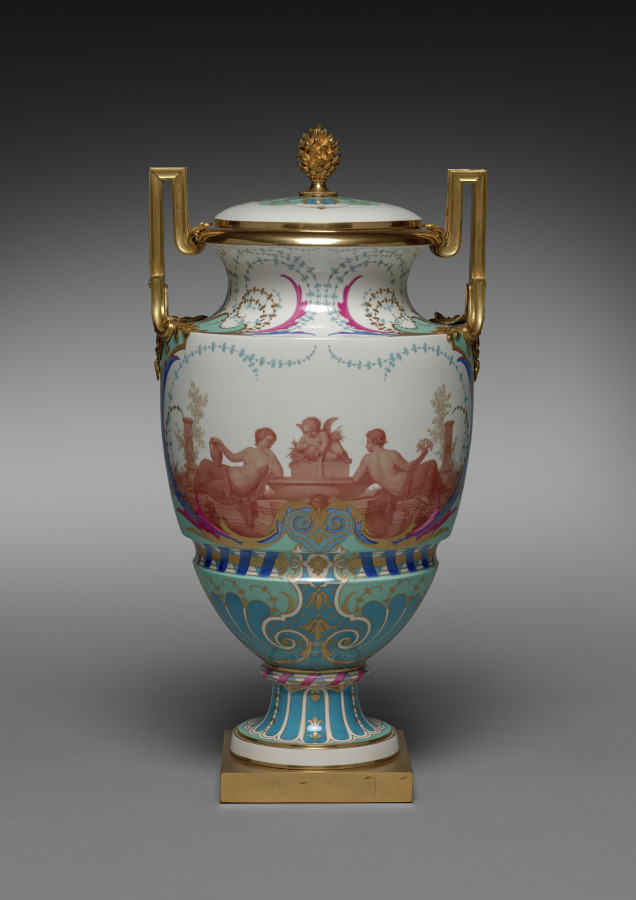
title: Vase Feuille d'Eau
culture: France, Sèvres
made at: Sèvres Porcelain Factory (French, est. 1756)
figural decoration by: Paul Marie Roussel (French, 1804–1877)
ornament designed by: Emile Renard (French)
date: 1858–62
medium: porcelain with gilt bronze mounts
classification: Ceramic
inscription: figural paintings signed obverse and reverse: "PMROUSSEL INV & PIN"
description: Feuille d'Eau means "waterleaf" and refers to the name given to the shape of this vase at the Sèvres factory. In English, waterleaf is the common name for a plant with bell-shaped flowers. The term is also applied to a stylized plant motif used in Graeco-Roman ornament. This vase was exhibited by the Sèvres firm at the International Exhibition held in London in 1862.